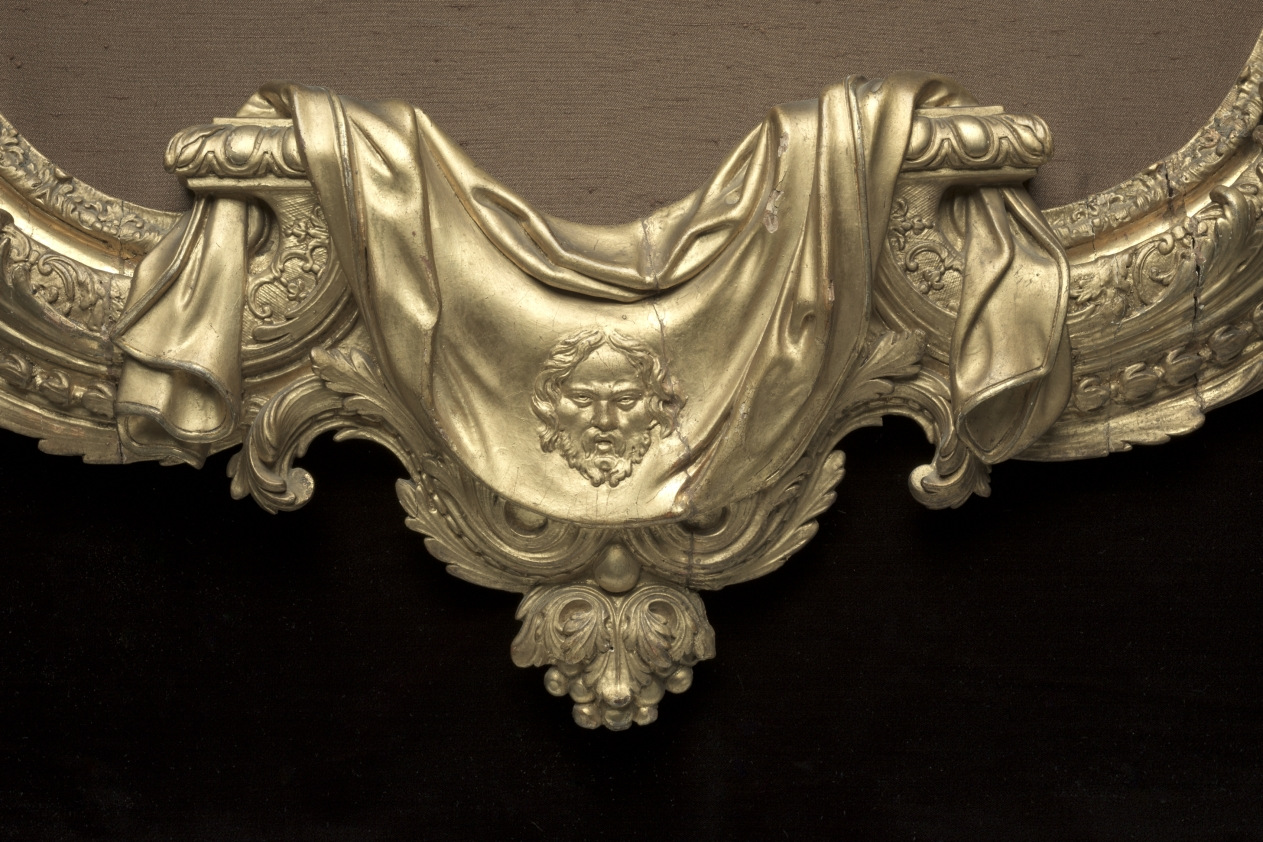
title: Frame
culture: France, early 18th Century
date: c. 1710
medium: carved and gilt wood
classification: Furniture and woodwork